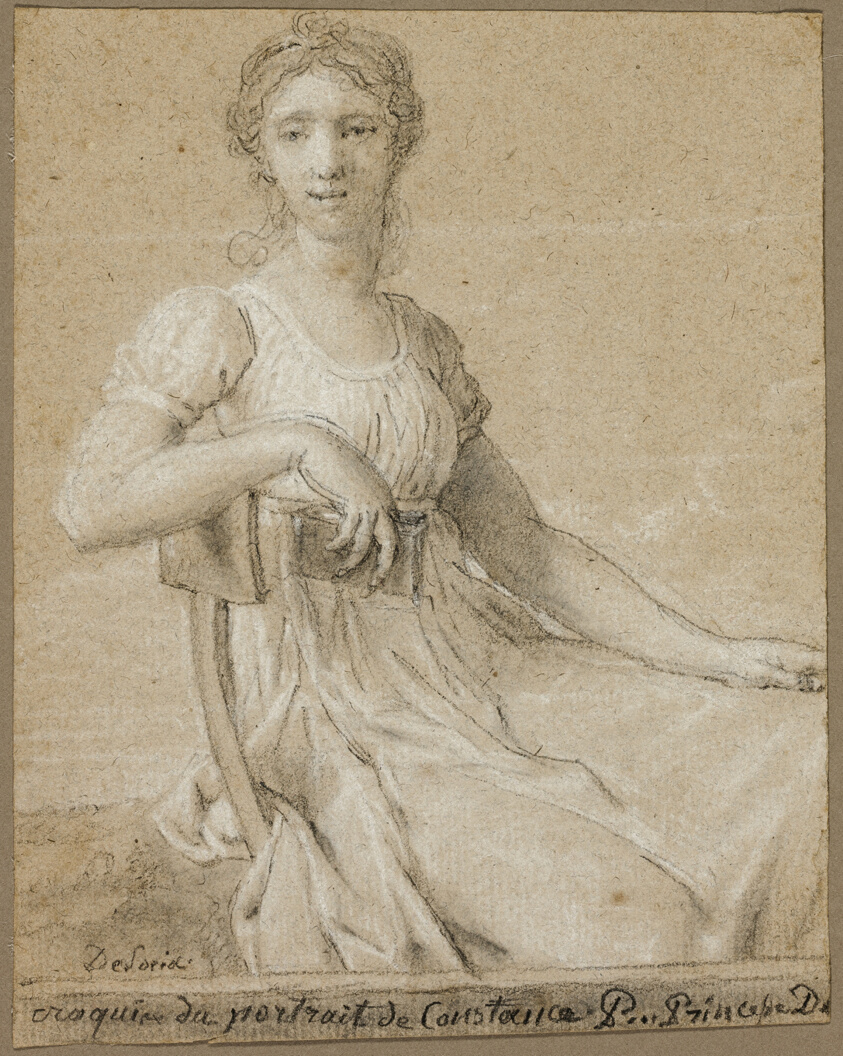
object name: Drawing and Watercolor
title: Sketch of the Portrait of Constance Pipelet (recto); Head of a Woman (verso)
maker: Jean Baptiste François Désoria (French, 1758-1832)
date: after 1797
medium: Black chalk with stumping, heightened with white chalk (recto and verso) on buff laid paper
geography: France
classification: charcoal; drawings (visual works); prints and drawing